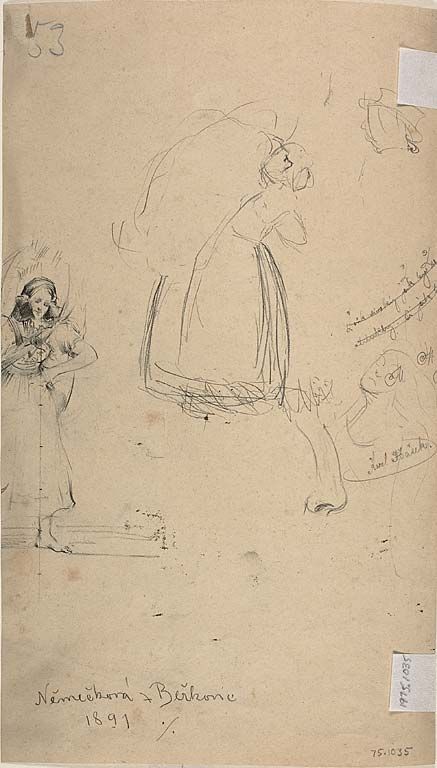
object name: Drawing and Watercolor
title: Girl in Peasant Dress (recto); Sheet of Sketches: Women and Girls (verso)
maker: Karel Vitezslav Masek (Czech, 1865-1927)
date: 1891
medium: Graphite (recto and verso) on cream wove paper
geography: Czech Republic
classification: graphite; drawings (visual works); prints and drawing